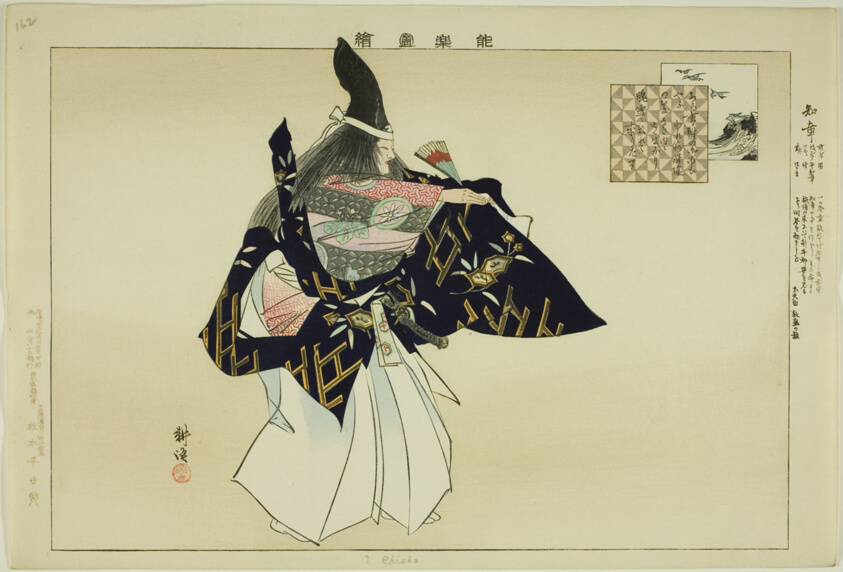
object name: Print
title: Chisho, from the series "Pictures of No Performances (Nogaku Zue)"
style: Japanese (culture or style)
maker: Tsukioka Kogyo; Japanese, 1869-1927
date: 1898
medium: Color woodblock print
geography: Japan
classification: woodblock print; print; asian art